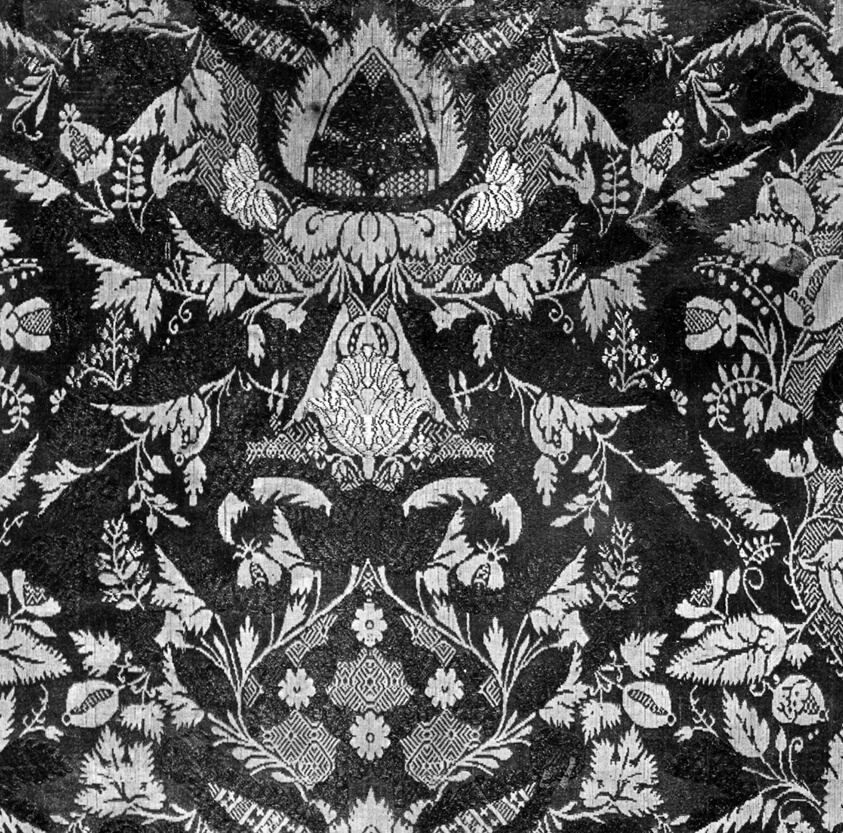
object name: Textile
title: Panel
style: louis xiv, european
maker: France, provincial, Nimes, Avignon, etc.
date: c. 1730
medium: Silk, gilt-metal-strip-wrapped silk, warp-float faced 7:1 satin weave with supplementary brocading wefts, supplementary binding wefts and self-patterning ground wefts tied by supplementary binding warps in plain interlacing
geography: France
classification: textile; weaving